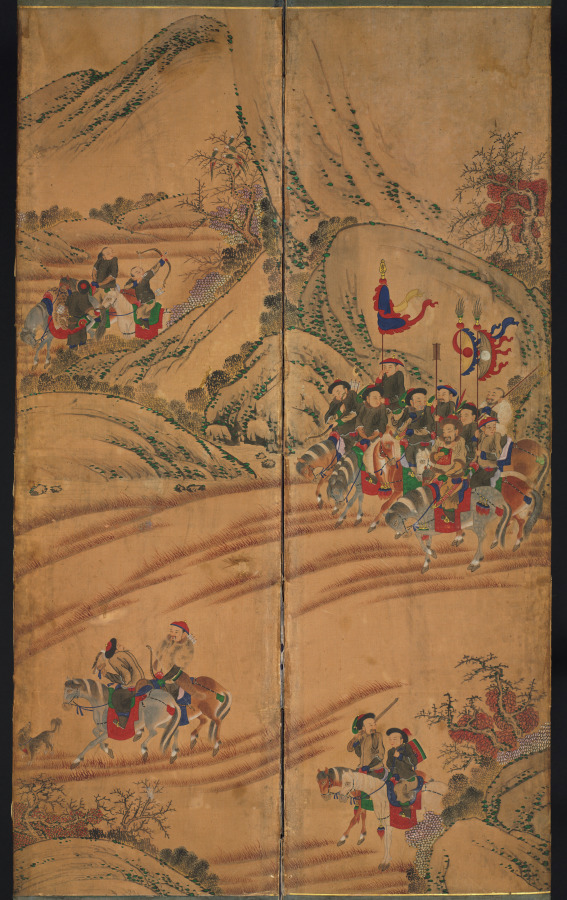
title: Hunting Scene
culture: Korea, Joseon dynasty (1392–1910)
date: 1800s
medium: eight-panel folding screen; ink and color on silk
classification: Painting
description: The theme of nomad warriors riding horses and hunting wild animals was first painted in the Qing imperial court in China in late 1600s. But it became favored by the Korean royal court and painted by the royal court painter in the late 1700s. The Joseon Korean ruling class members considered Qing nomad warriors to be "barbaric," yet highly admired their hunting and military skills. By the late 1800s, folding screens with the hunting scene were used largely for this dynamic and exotic feature.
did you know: The theme of nomad warriors hunting became highly appreciated in the Korean royal court of the 1700s for the king's particular interests in strengthening the royal army's military prowess.